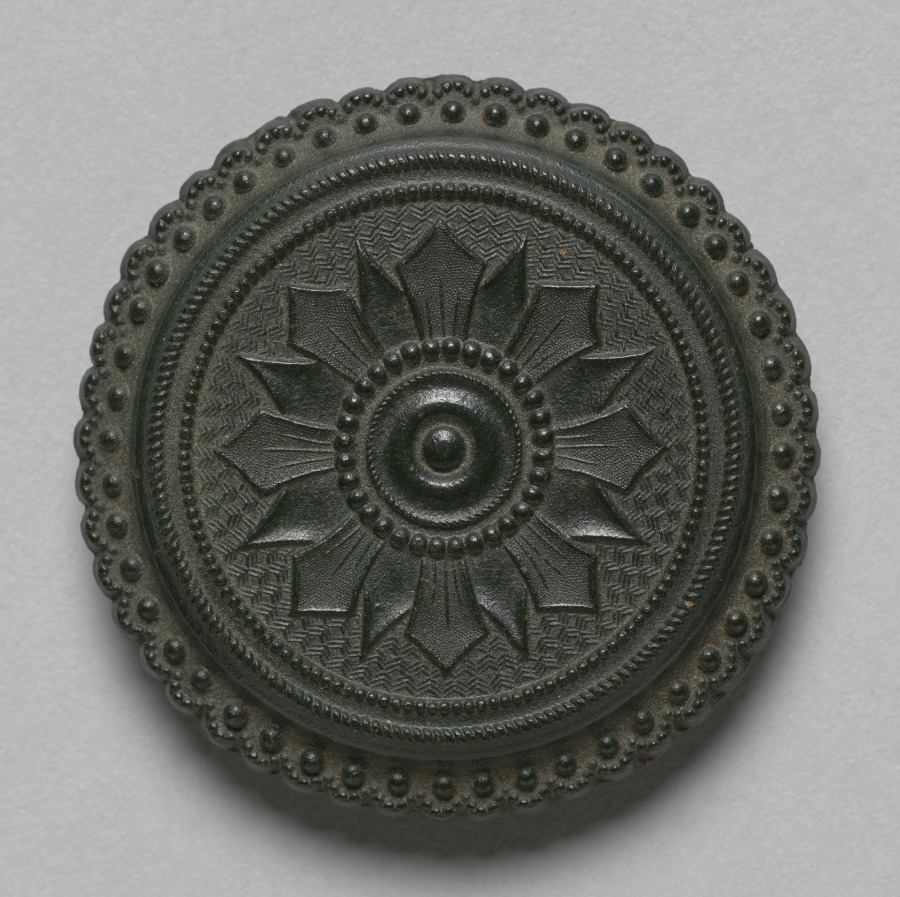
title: Portrait of a Young Woman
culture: America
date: c. 1855–60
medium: Tintype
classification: Photograph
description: It seemed a miracle that anyone could afford to have an accurate record of their own likeness or those of their loved ones. This portrait is an excellent example of the hundreds of thousands of portraits produced by commercial photographers in mid-nineteenth-century America. Small scale yet housed in an elaborately decorated thermoplastic case, it was intended to be carried by its owner or displayed on parlor tables or knickknack shelves.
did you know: During the first decades of photography, portraits far outnumbered every other type of image.